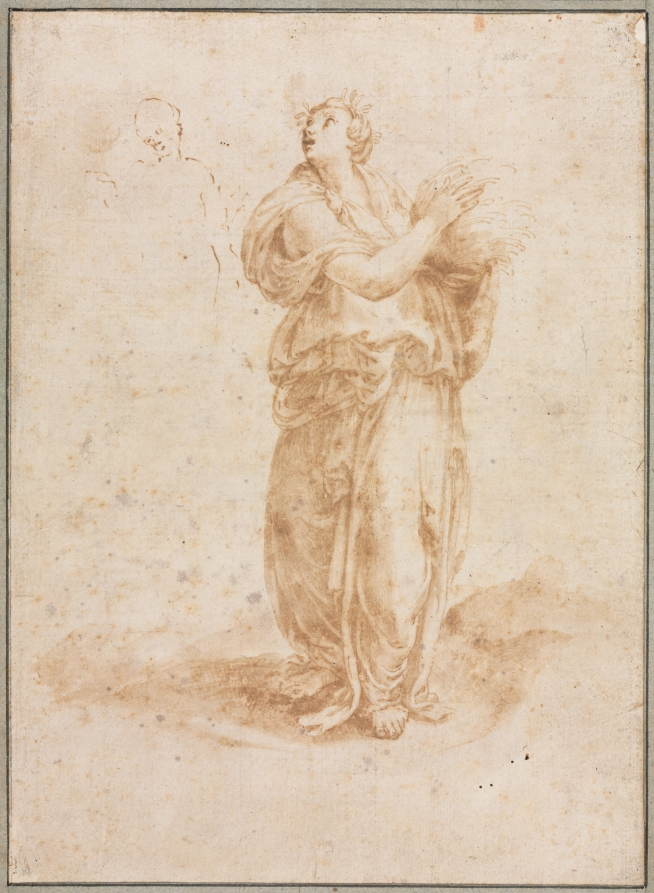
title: Ceres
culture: Italy, 16th century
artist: Lelio Orsi (Italian, 1511–1587)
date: 16th century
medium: pen and brown ink and brush and brown wash; incised, squared in black chalk, framing lines in graphite (left and bottom)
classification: Drawing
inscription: RECTO OF SECONDARY SUPPORT, upper left, in brown ink: [del?] cat 63 ; VERSO OF SECONDARY SUPPORT, lower center, in brown ink (on separately applied piece of paper): nta tre[illegible] [cropped at beginning and end of inscription] ; upper center, in blue pencil: # 53 ; upper right, in blue pencil: 20 ºº ; center, in graphite: 88 [circled] ; lower left, in graphite: [illegible] 63 . [sideways]